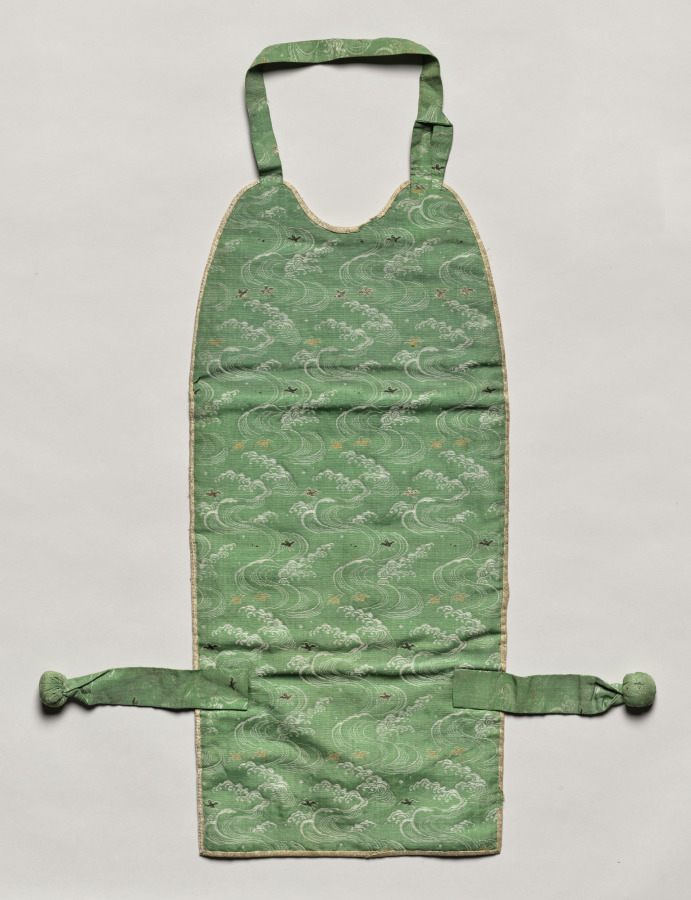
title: Plastron or Frontpiece for a Firefighter's Suit (Kaji shōzoku)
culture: Japan, Edo period (1615–1868)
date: late 1700s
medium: Wool (rasha); applique and silk and gold thread cord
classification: Textile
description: Wood architecture in densely populated areas made firefighting a frequent occurrence in the Edo period (1615–1868). Jackets made of leather or wool offered firefighters protection against the flames. Wool was imported from Europe. The triple ring crest in white is of the “three alternating rings” (mitsurin chigai) type framed in a tortoise shell (kikko) motif, and identified the house with which the wearer was affiliated.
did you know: Wool has self-extinguishing properties that protect the wearer from fire.